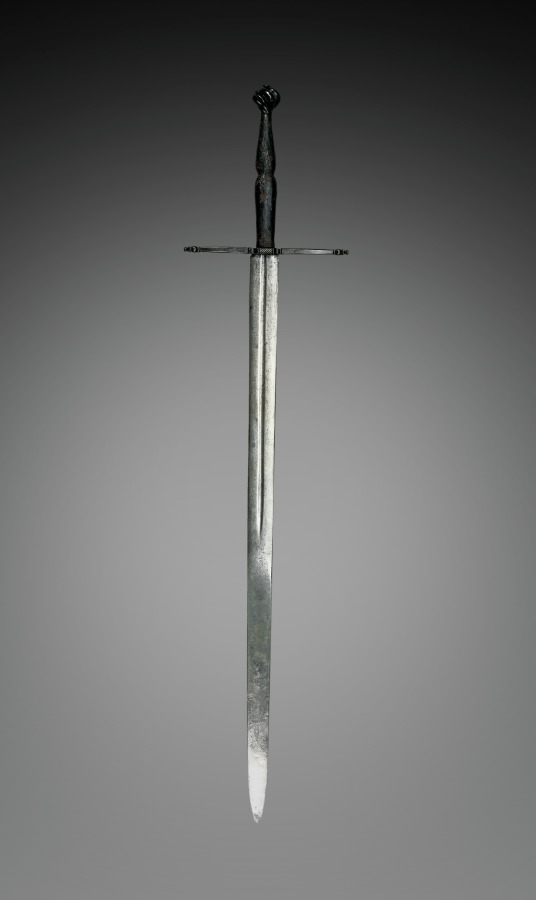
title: Hand-and-a-Half Sword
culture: South Germany, early 16th Century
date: c. 1500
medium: steel, wood, leather; quillions and spirally fluted pommel of blackened steel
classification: Arms and Armor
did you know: This sword came to be called a hand-and-a-half, because it could either be used with both hands or just one.